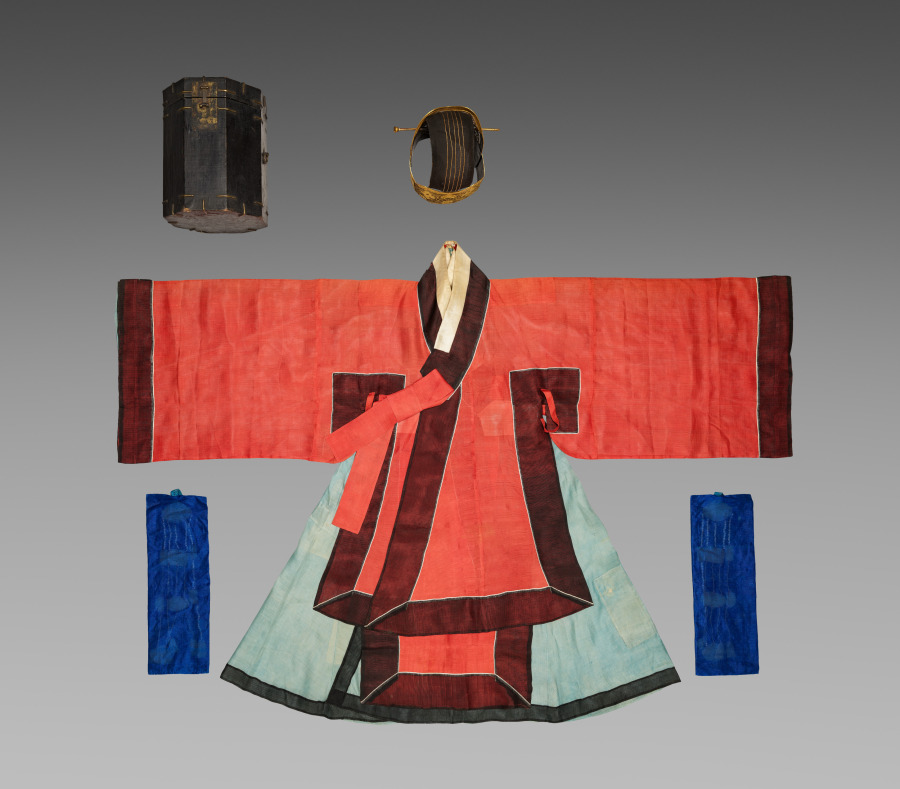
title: Royal Ceremonial Costume and Accessories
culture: Korea, Joseon dynasty (1392–1910)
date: late 1800s-early 1900s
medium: gilded paper, wire, black silk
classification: Garment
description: This is a set of royal ceremonial robe and accessories worn by a high-ranking court official for attending special state ceremonies. The set consists of an inner coat, an outer coat, a skirt, a back apron, a crown, a pair of jade tassels, a tablet, and a belt.